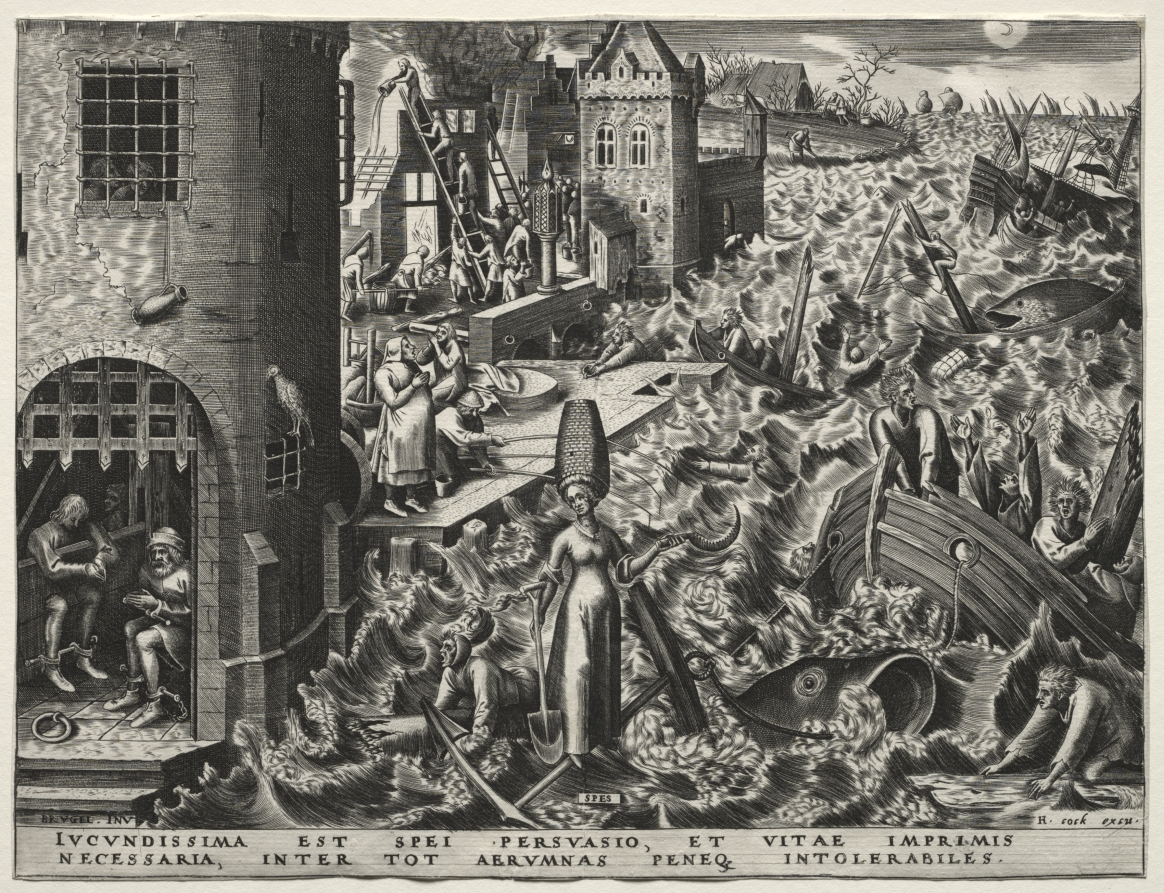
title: Hope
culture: Flanders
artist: Pieter Bruegel (Netherlandish, c. 1525/30–1569)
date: 1559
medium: engraving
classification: Print